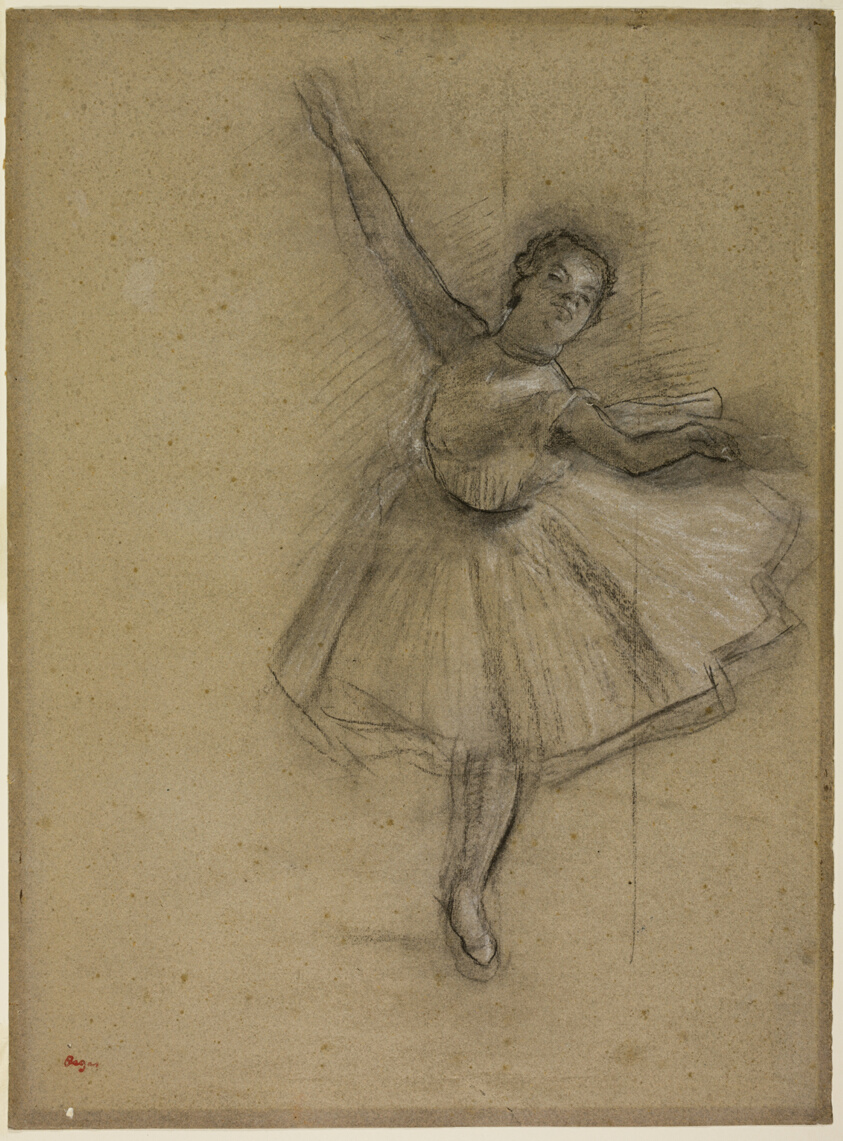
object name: Drawing and Watercolor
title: Dancer Turning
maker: Edgar Degas; French, 1834-1917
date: c. 1876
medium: Charcoal, heightened with white chalk, with stumping, on pinkish-gray laid paper with blue fibers (discolored to brownish-gray)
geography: France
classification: charcoal; drawings (visual works); prints and drawing; paper